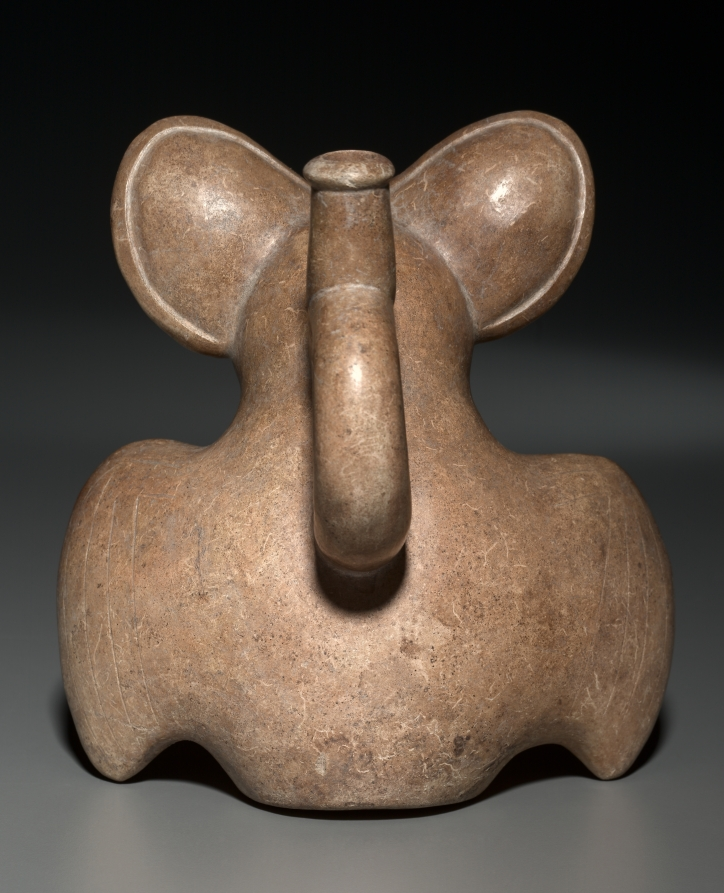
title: Big-Eared Brown Bat Vessel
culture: Central Andes, North Coast, Moche people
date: 200–850 CE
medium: ceramic, slip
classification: Ceramic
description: This bat, perhaps shown opening its wings before taking flight, illustrates Moche artists’ keen interest in realism and in capturing activity at its peak. Moche bat symbolism may be linked to the animal’s paradoxical traits—for instance, bats fly but have fur rather than feathers. Such traits may have caused the Moche to link bats with transitional states, such as the passage between life and death. The vessel depicts a member of the Histiotus mochica species, a big-eared brown bat that researchers described in 2021 and, due to this vessel, named in honor of the Moche, also known as the Mochica.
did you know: This vessel depicts a big-eared brown bat.